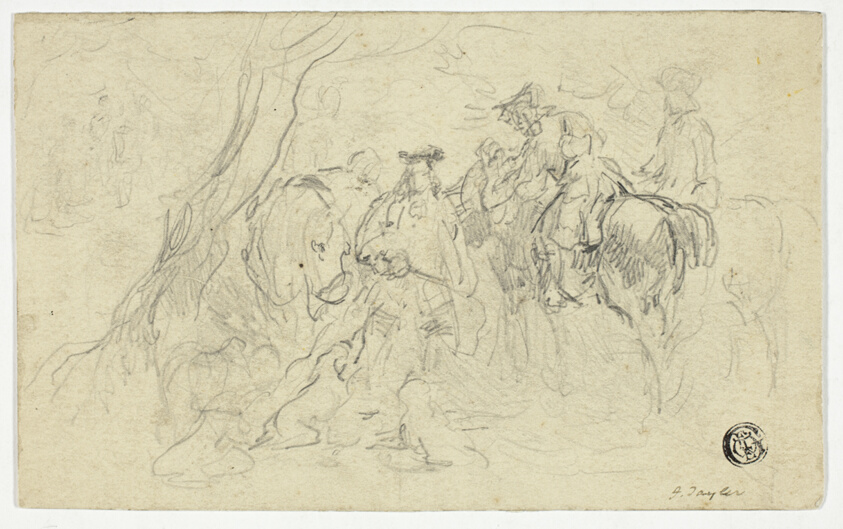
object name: Drawing and Watercolor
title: Calvarymen Beside Tree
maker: John Frederick Tayler (English, 1802-1889)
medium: Graphite on cream wove card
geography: England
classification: graphite; drawings (visual works); prints and drawing